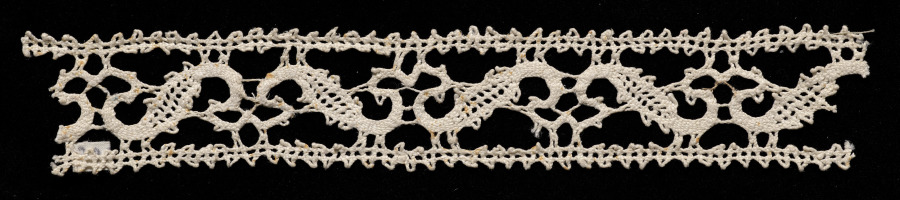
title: Lace Insertion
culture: Italy, Venice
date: 1500s–1600s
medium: Bobbin lace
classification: Lace